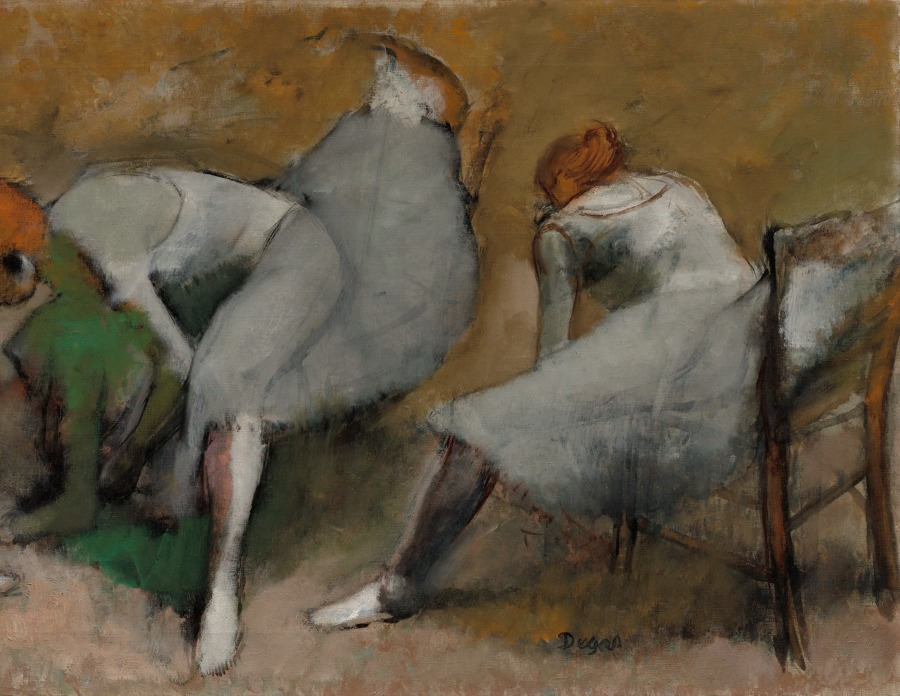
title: Frieze of Dancers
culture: France, 19th century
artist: Edgar Degas (French, 1834–1917)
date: c. 1895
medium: oil on fabric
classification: Painting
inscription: Signed in lower right: Degas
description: This painting may depict a single dancer seen from four different viewpoints. The young woman is placed in an undefined setting, surrounded by mere wisps of color, applied so spontaneously that the paint ran and dripped. Degas even added the circles in the foreground with his thumb. Such audacity, while acceptable in a small sketch, must have shocked the artist's contemporaries when presented on a six-foot canvas. Equally radical is the idea of combining multiple views of a single figure. Degas's unusual presentation may have been inspired by the photographs of Eadweard Muybridge (1830-1904)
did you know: The ballet is a subject Degas returned to again and again over the course of his career. Rather than public performances, he often depicted dancers behind the curtain, practicing, waiting, or, as in this painting, lacing up their shoes.